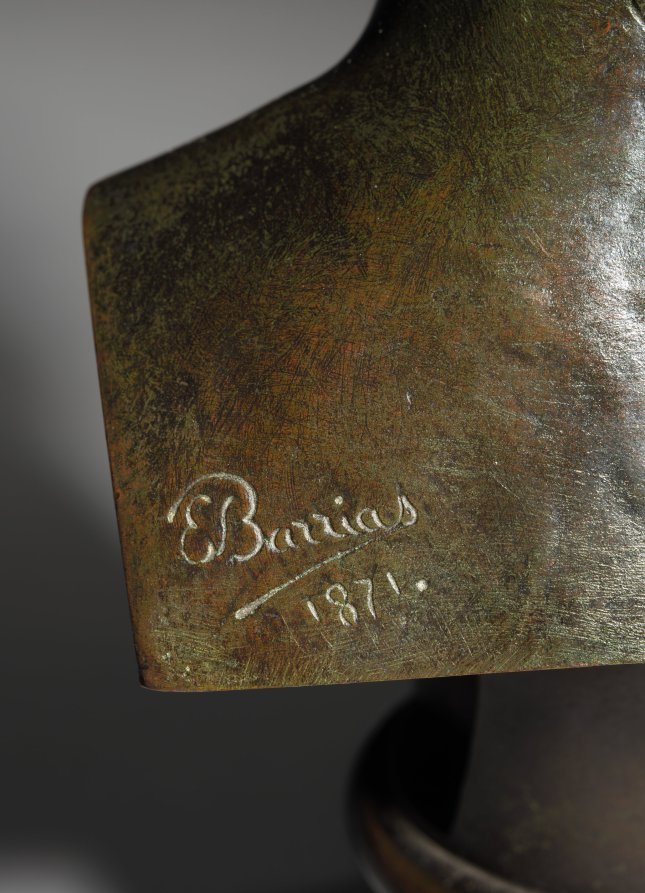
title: Henri Regnault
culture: France, 19th century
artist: Louis-Ernest Barrias (French, 1841–1905)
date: 1871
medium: bronze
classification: Sculpture